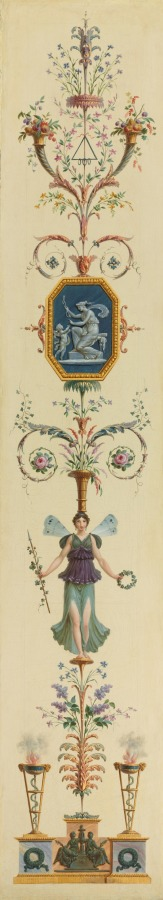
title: Decorative Panel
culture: France, 18th century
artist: Pierre Rousseau (French, 1751–1829)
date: 1790s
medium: oil on canvas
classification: Painting